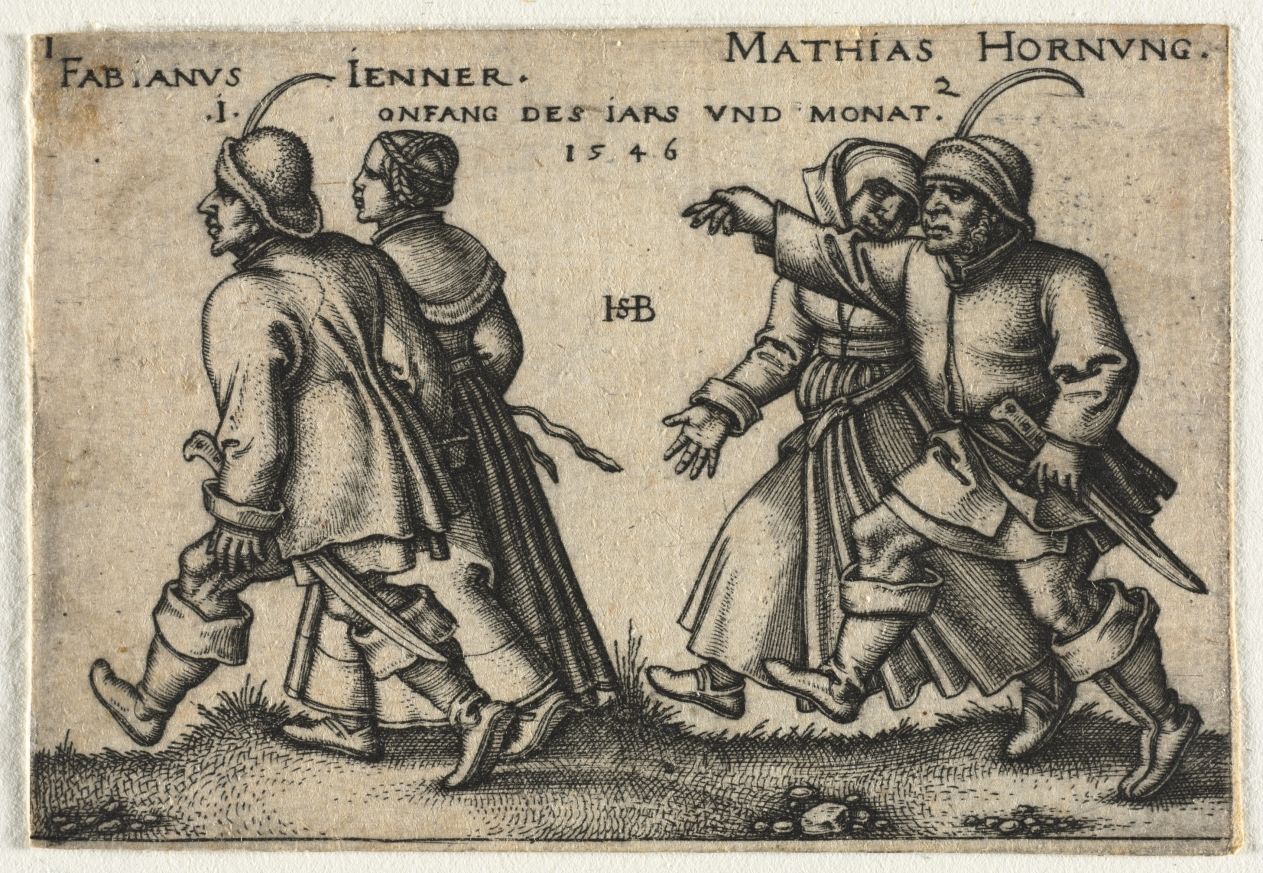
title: The Peasant Wedding or the Twelve Months: 1-Fabianus Jenner 2-Mathias Hornung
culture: Germany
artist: Hans Sebald Beham (German, 1500–1550)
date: 1546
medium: engraving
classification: Print